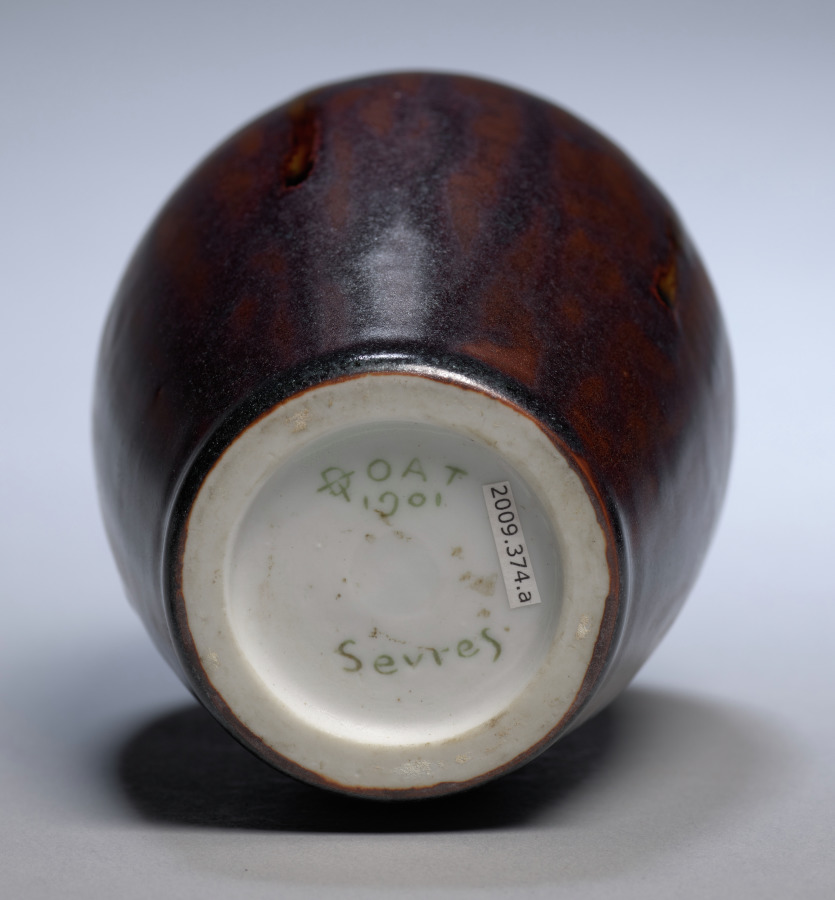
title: Vase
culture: France, 20th century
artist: Sèvres Porcelain Factory (French, est. 1756)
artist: Taxile Maximin Doat (French, 1851–1939)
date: 1901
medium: porcelain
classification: Ceramic